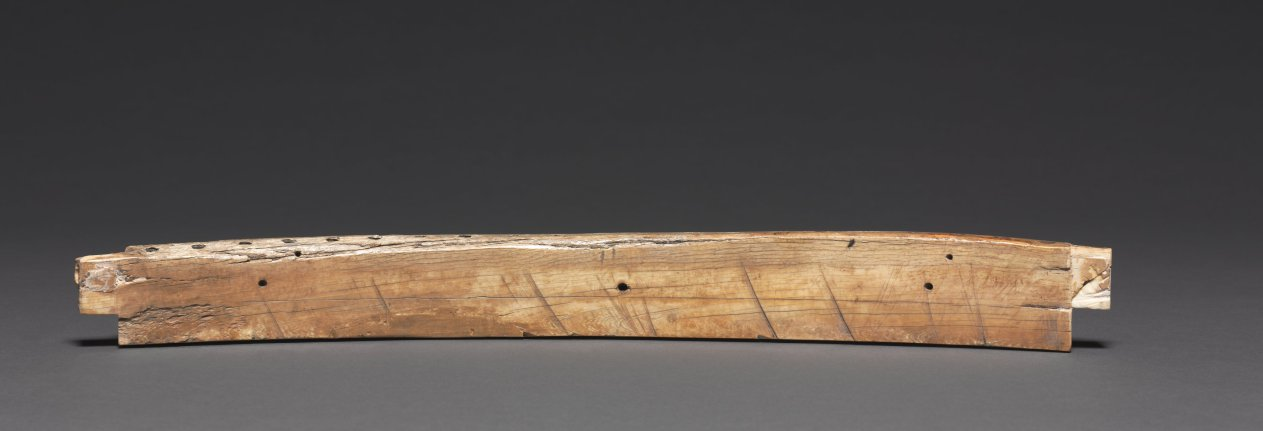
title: Panel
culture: India, Mughal dynasty (1526-1756)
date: 1600s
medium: ivory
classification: Ivory